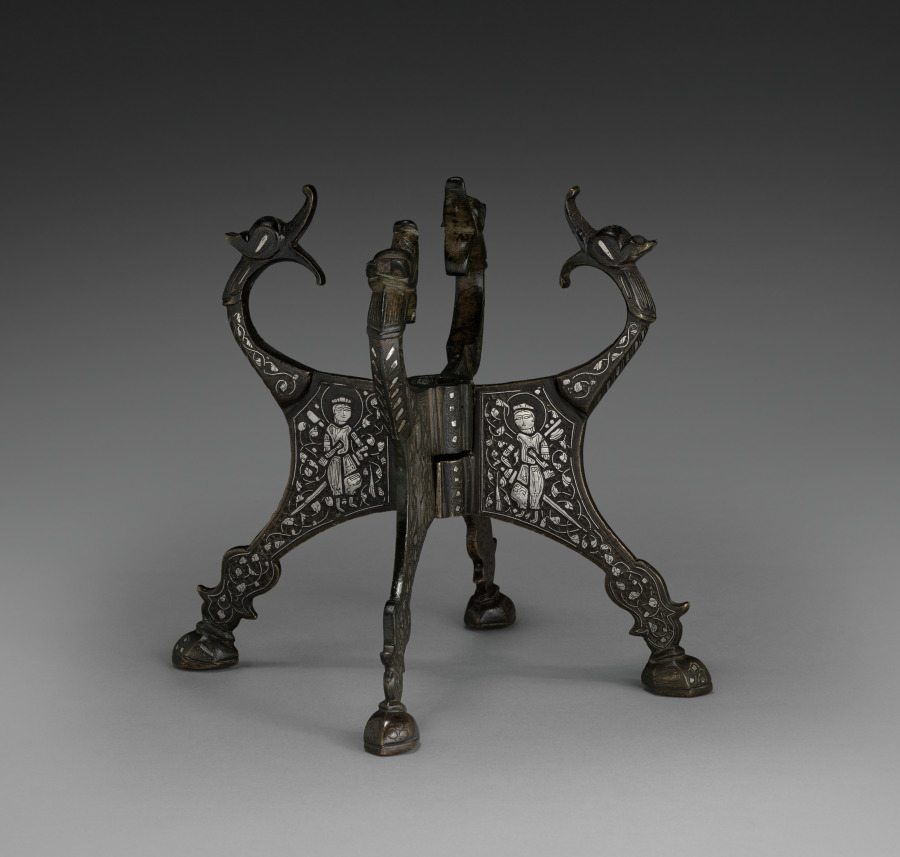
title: Dragon-headed Stand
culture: Northern Iraq or Syria, Zangid (1127–1251) or Ayyubid period (1171–1260)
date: 1200s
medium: cast brass inlaid with silver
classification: Metalwork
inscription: None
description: Themes of hunting and combat are evoked by this stand with gaping dragon heads and figures armed with swords and spears.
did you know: The four-legged stand has two interlocking parts.